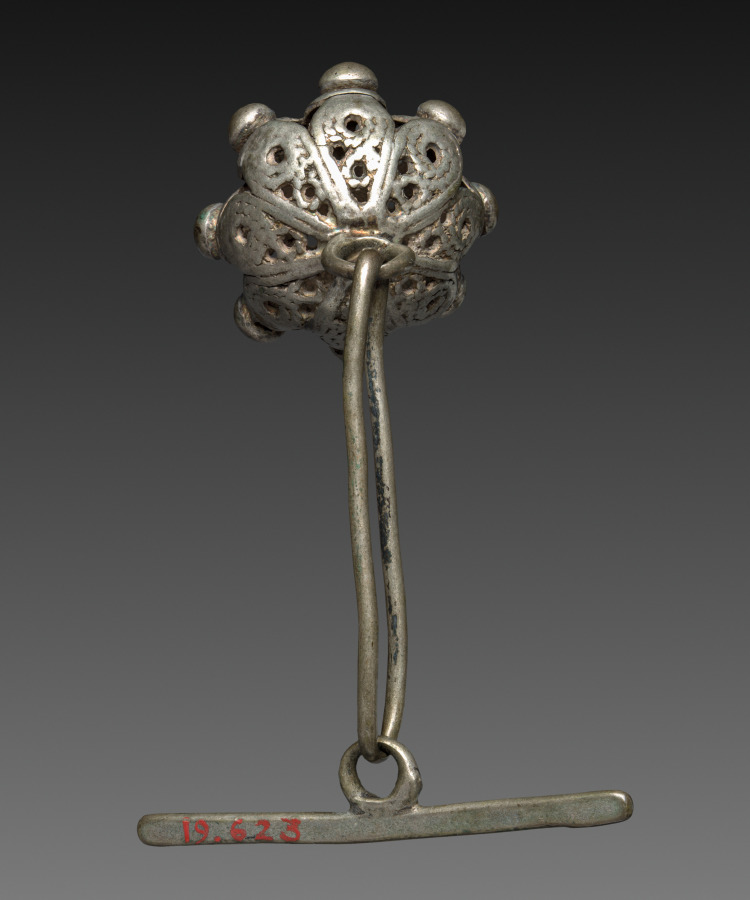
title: Button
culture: Italy, Sardinia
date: 1800s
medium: silver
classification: Jewelry